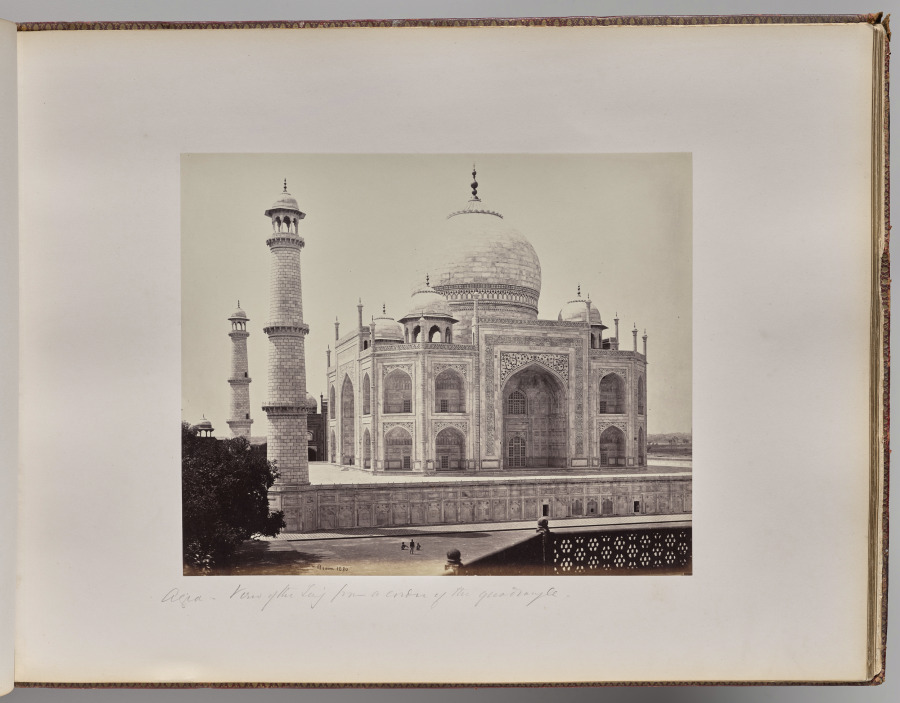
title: Agra. View of the Taj from a Corner in the Quadrangle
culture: England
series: Photographs of Northern India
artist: Samuel Bourne (British, 1834–1912)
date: 1863–70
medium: albumen print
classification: Photograph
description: The 50 images in this album, all taken in the 1860s, move from the hill towns of the Himalayas down to cities including Lahore (now in Pakistan), Delhi, Lucknow, Agra, Benares (now Varansi), and Calcutta (now Kolkata). Architectural studies of major monuments offer valuable historical records of what sites such as the Taj Mahal and the imperial mosque of the Mughal emperors in Delhi looked like before twentieth-century restorations.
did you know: Samuel Bourne, the author of most the images in this album, was a banker in England before he moved to India to become a professional photographer.